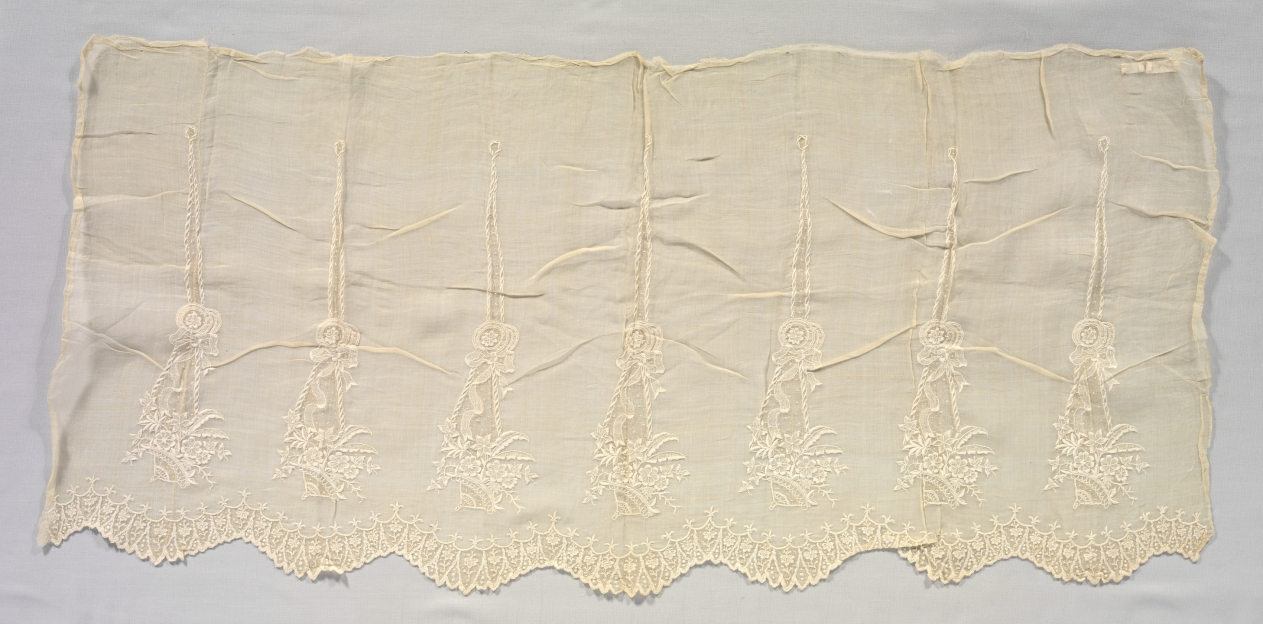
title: Sleeve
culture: Philippines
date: c. 1875–1900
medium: Plain weave piña: needle lace (drawnwork) and embroidery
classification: Embroidery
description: This unsewn sleeve panel is made of fine piña fiber in plain weave. The lower edge is finished with a wide hand-embroidered cotton border featuring scalloped edging and repeating floral and geometric motifs. Vertical embroidered elements are arranged in regular intervals above the border.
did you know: Piña comes from pineapple plants, which the Spanish brought to the Philippines from South America.